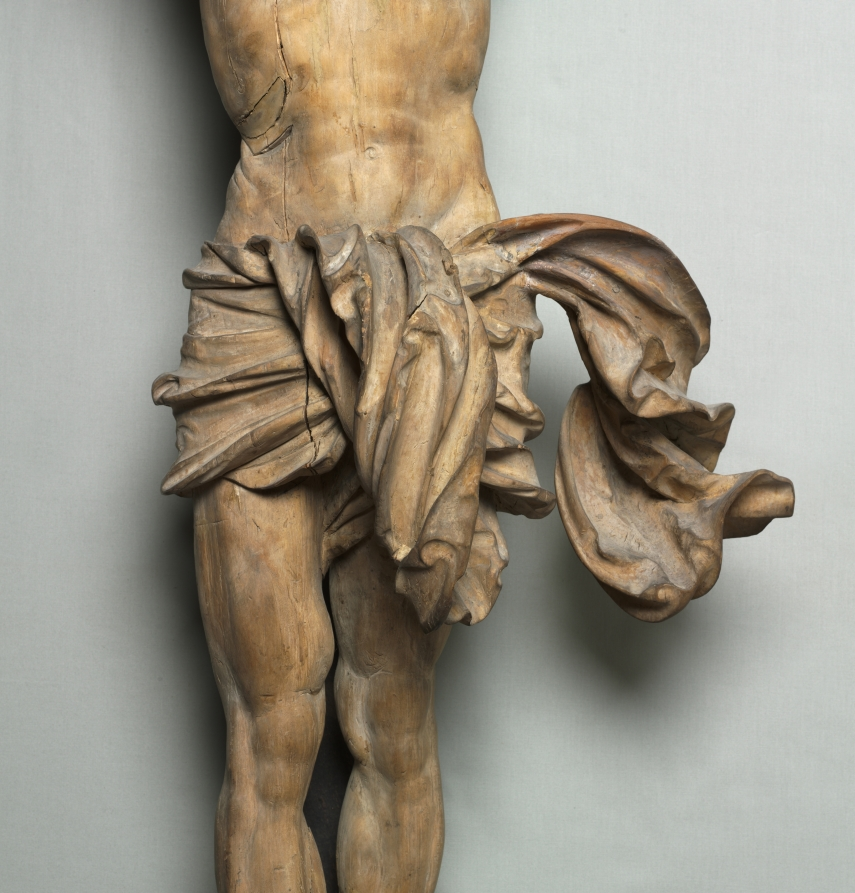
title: Crucified Christ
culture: Germany, Landshut, 16th century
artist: Hans Leinberger (German)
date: c. 1525–1530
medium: lindenwood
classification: Sculpture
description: This sculpture is possibly the best of several crucifixes by this famous sculptor from the Bavarian town of Landshut on the Upper Danube. The pathos and graphic realism with which the artist has modeled the body of Christ ranks this sculpture as one of the artist’s finest works. Leinberger was, along with Matthäus Krennis, an outstanding exponent of the late Gothic style pervasive throughout the Upper Danube area of southeastern Germany during the first decades of the 1500s. This sculpture was probably suspended over the main altar of a church whose origins have not been identified.